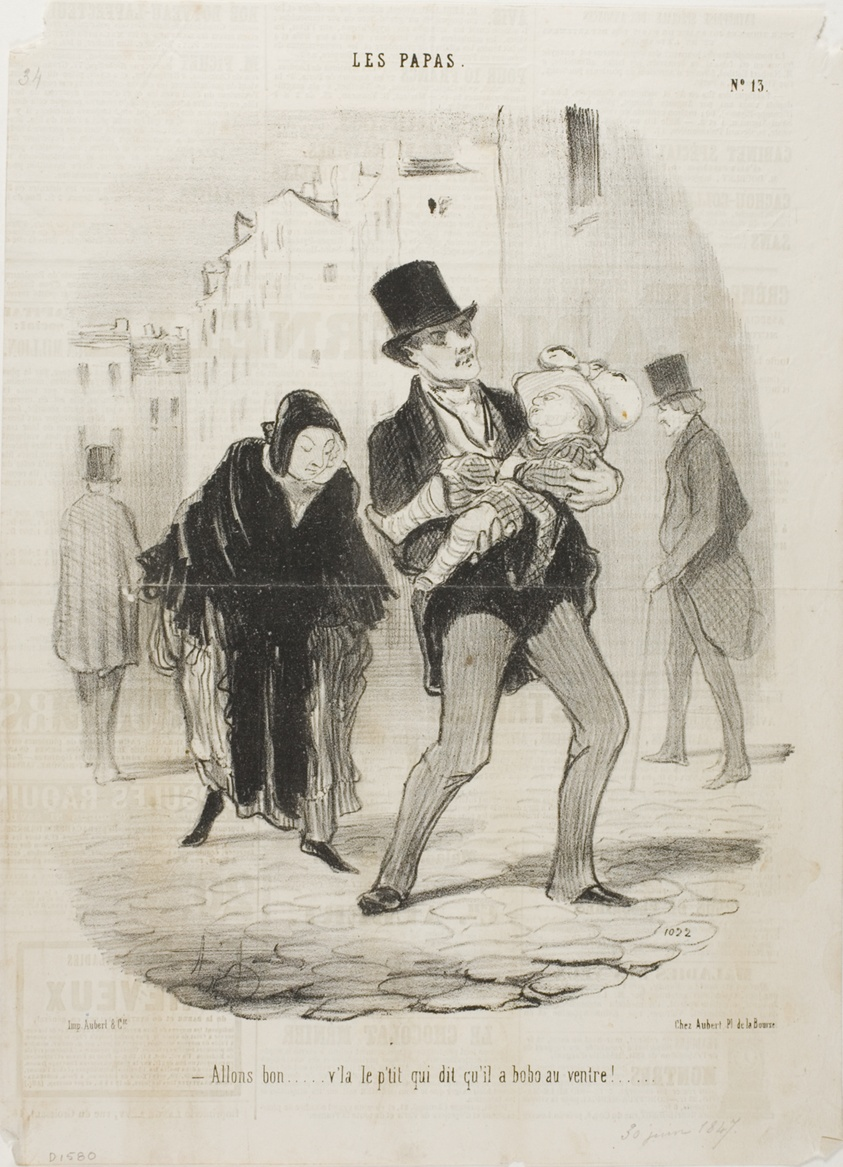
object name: Print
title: “- Yes alright, but the poor boy's belly is hurting,” plate 13 from Les Papas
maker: Honoré Victorin Daumier; French, 1808-1879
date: published June 30, 1847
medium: Lithograph in black on cream wove paper, with text added in another hand and letterpress verso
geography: France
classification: lithograph; print; prints and drawing